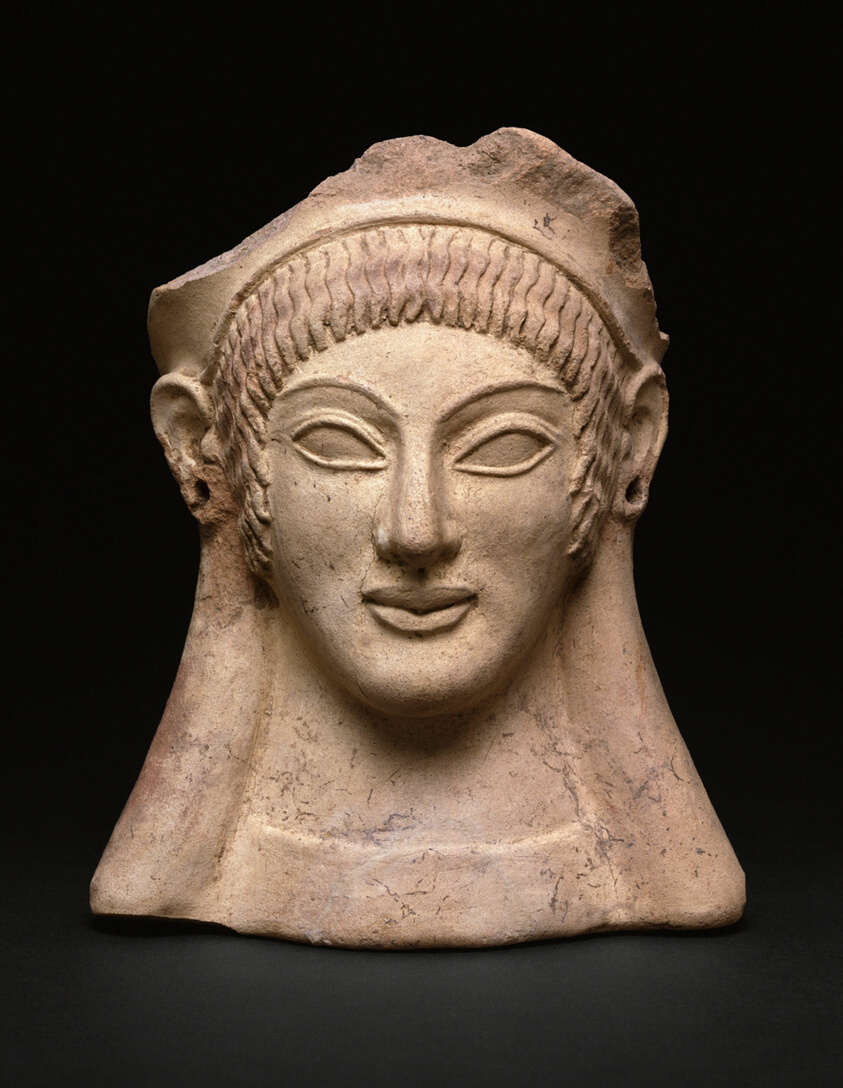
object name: Sculpture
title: Votive (Gift) in the Shape of a Woman's Head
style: early etruscan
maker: Etruscan; possibly Veii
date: about 500 BCE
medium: terracotta, pigment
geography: Veio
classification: ceramics; earthenware; sculpture; ancient art